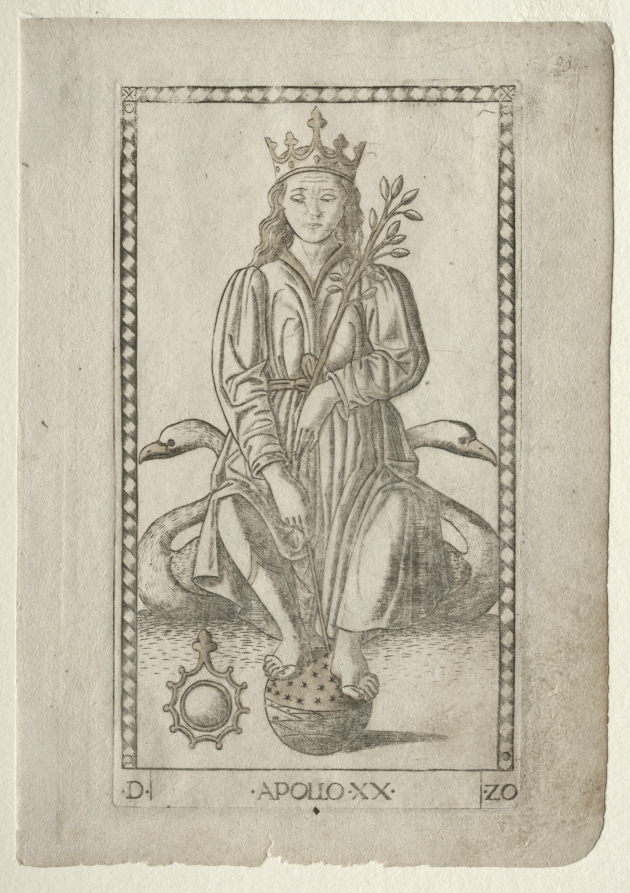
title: Apollo (from the Tarocchi, series D: Apollo and the Muses, #20)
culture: Italy, Ferrara, 15th century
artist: Master of the E-Series Tarocchi (Italian, active 1460s)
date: before 1467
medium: engraving hand-colored with gold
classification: Print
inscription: Lettered below the image of Apollo: ·D·/ ·APOLLO·XX· / ·20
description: This engraving is part of the Tarocchi group marked with the letter “D”, and named Apollo and the Muses. In Greek mythology, the nine Muses (Calliope, Urania, Terpsichore, Erato, Polyhymnia, Thalia, Melpomene, Euterpe, and Clio) were the daughters of Zeus, king of the gods, and Mnemosyne, the Titaness of memory. The Muses were goddesses presiding over different branches of the arts and sciences. Their leader and supervisor was Apollo, the god of light, music, prophecy, and poetry. Here, Apollo is personified as a full-length crowned male figure, frontal view, and seated on two swans. He carries a laurel branch in his left hand, while pointing a stick to the celestial globe on which his feet are resting. Apollo was the son of Zeus and Leto, and was regarded as the god of Mousike (Art of the Muses).